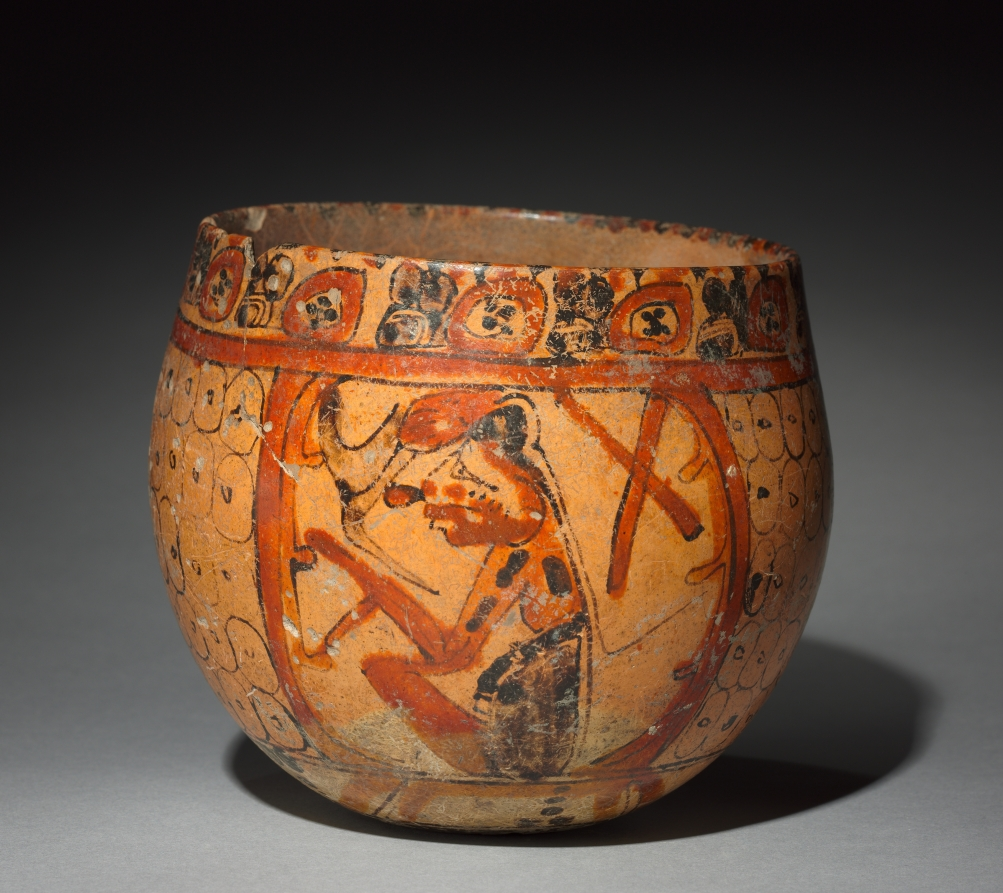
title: Bowl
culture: Mexico or Guatemala, Maya, Late Classic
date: 600–900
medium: pottery with burnished, colored slips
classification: Ceramic